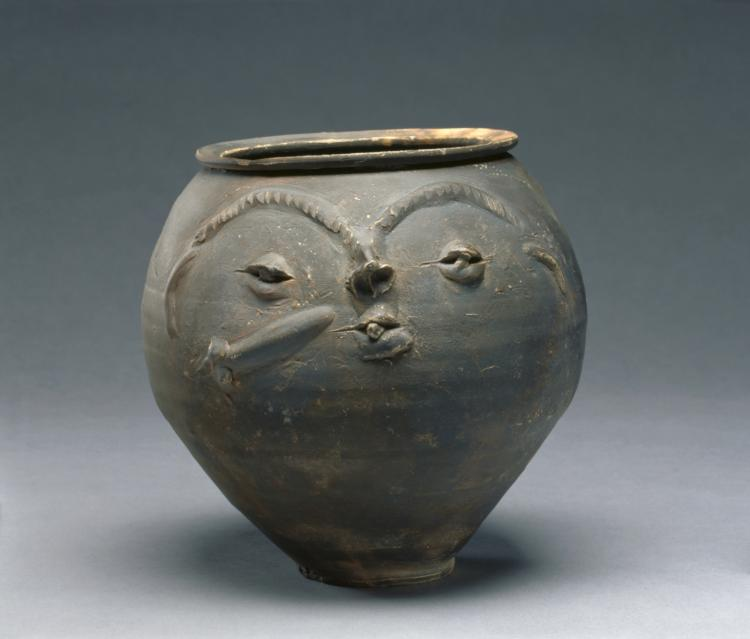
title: Face Urn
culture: Rhenish (Cologne), Gallo Roman, 2nd quarter, 1st Century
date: 25–50 CE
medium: reddish ware with gray burnished slip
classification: Ceramic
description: This wheel-thrown vase is decorated with humanlike facial features and a phallus applied to the face’s cheek. Wide arching eyebrows meet at the short bridge of the face’s puggy nose, which sits over lips pursed around its protruding tongue. Finger marks can be seen around the eyes and eyebrows where clay was added onto the surface of the vessel to form the facial features.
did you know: The phallus was often used as a protective symbol in the ancient world.